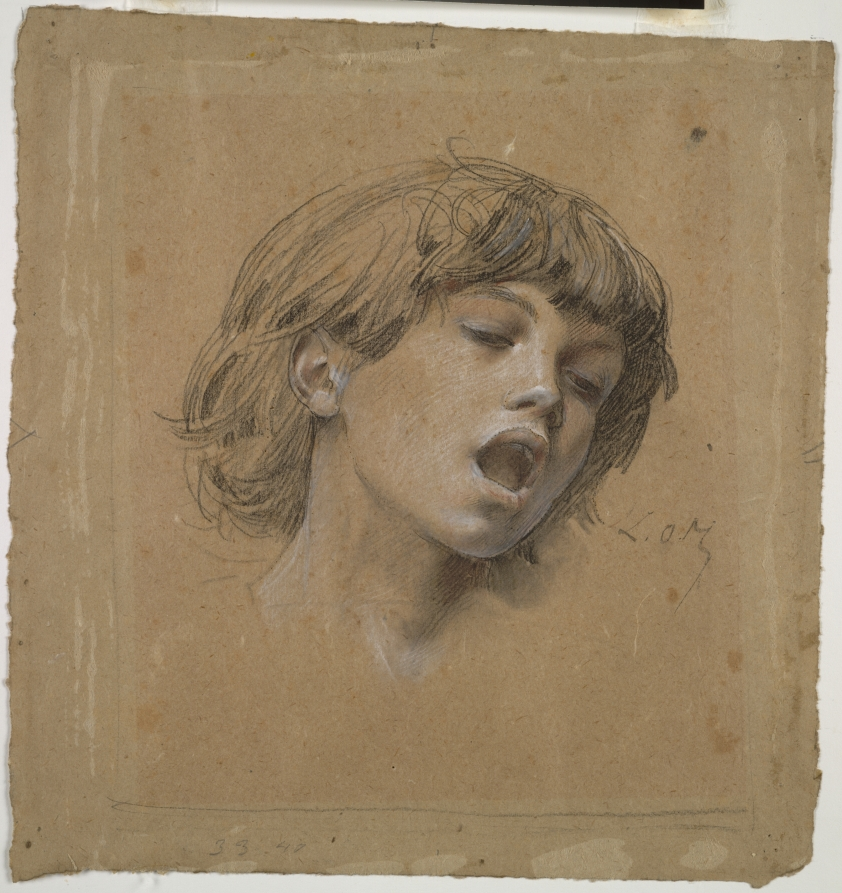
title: Head of a Boy Singing (Study for Music)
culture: France, 19th century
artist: Luc-Olivier Merson (French, 1846–1920)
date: c. 1898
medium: black, white, and red chalk with stumping, pricked for transfer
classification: Drawing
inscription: signed, center right, in black chalk: L. O. M; lower left, in graphite: 33 40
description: This sheet was a preparatory study for the face of a singing boy who appears near the center of Music, a mural decorating the left grand staircase at the Théâtre National de l’Opéra-Comique in Paris. Drawn from life with exquisite naturalism, Luc-Olivier Merson captured the sitter’s youthful beauty with such clarity that the purity of the boy’s voice seems to emanate from the drawing.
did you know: The face of the boy in this drawing is pricked extensively so that the image could be transferred directly to the final painting for which it was a study. The two works differ only in the addition of a hat on the boy's head in the final work.